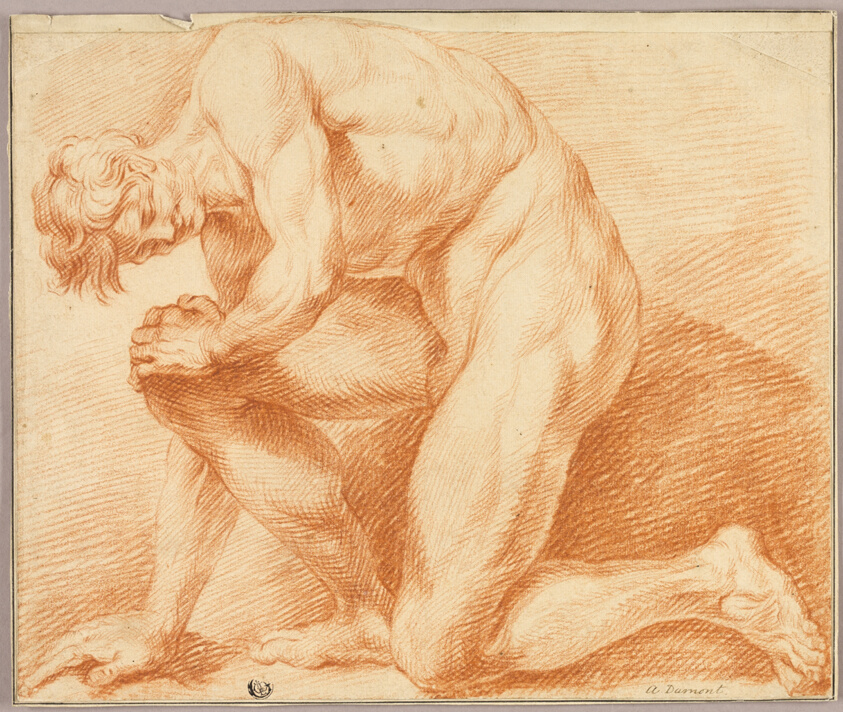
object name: Drawing and Watercolor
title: Kneeling Academic Male Nude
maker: Antoine Dumont (French, c. 1638-1676)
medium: Red chalk on cream laid paper, laid down on cream laid paper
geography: France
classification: chalk; paper; drawings (visual works); prints and drawing